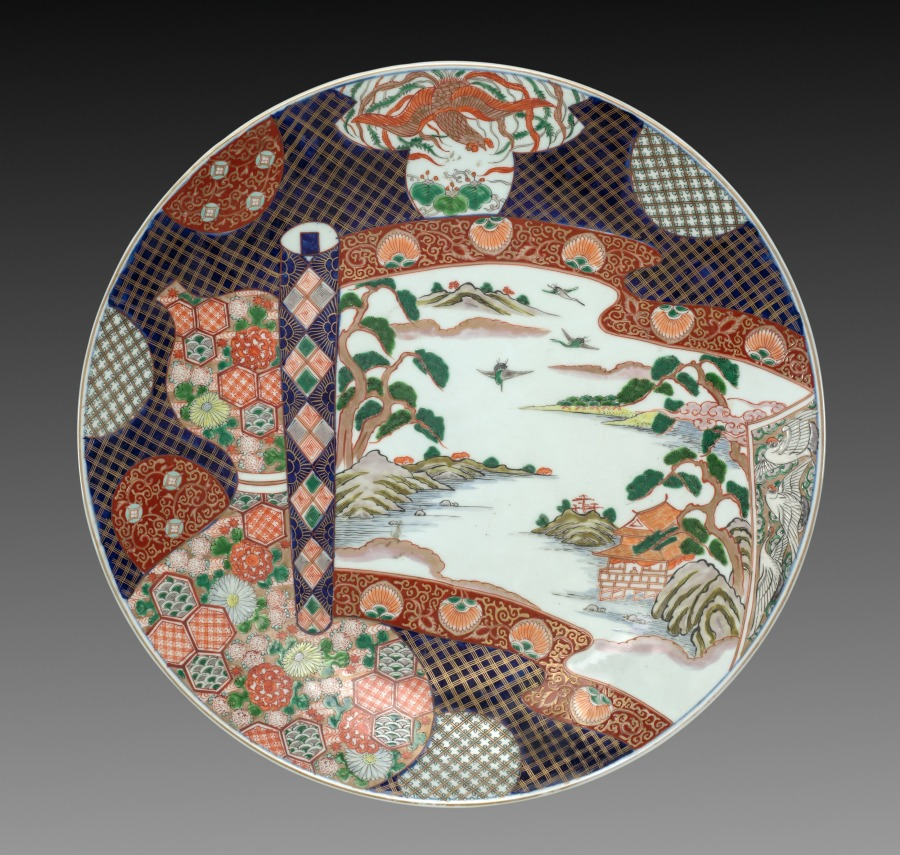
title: Dish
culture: Japan, Meiji period (1868–1912)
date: late 1800s-early 1900s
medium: overglaze enameled porcelain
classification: Ceramic